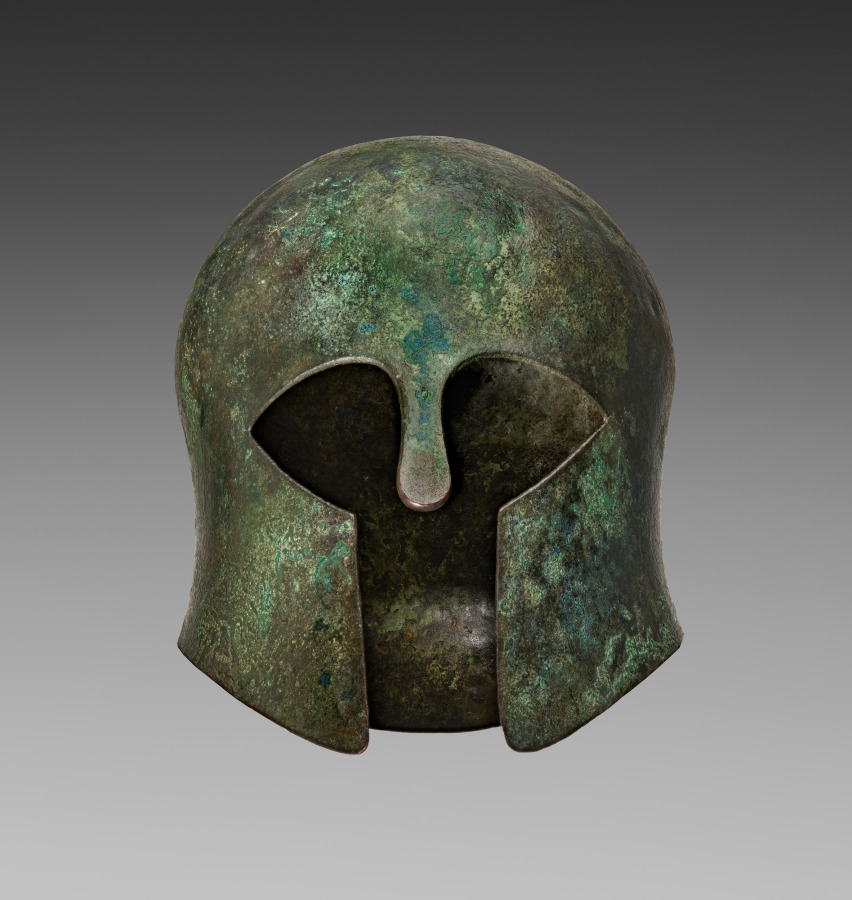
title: Corinthian Helmet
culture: Greek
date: c. 625–550 BCE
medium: Bronze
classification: Arms and Armor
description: This remarkably well-preserved bronze helmet belongs to an iconic type known as Corinthian yet produced far beyond the city of Corinth. Designed for use by hoplite warriors, who fought with spears and shields in shoulder-to-shoulder (phalanx) formation, such helmets provide maximum protection but limited vision, hearing, and movement. Probably first cast and then hammered into its final shape, the helmet features both gentle curves and sharp angles, evoking the head and face that it protected. Similar helmets appear frequently on warriors shown in ancient art, though often with crests of horsehair or other organic materials that no longer survive.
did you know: A small hole above the rear neckline, now repaired, may reflect a fatal blow.